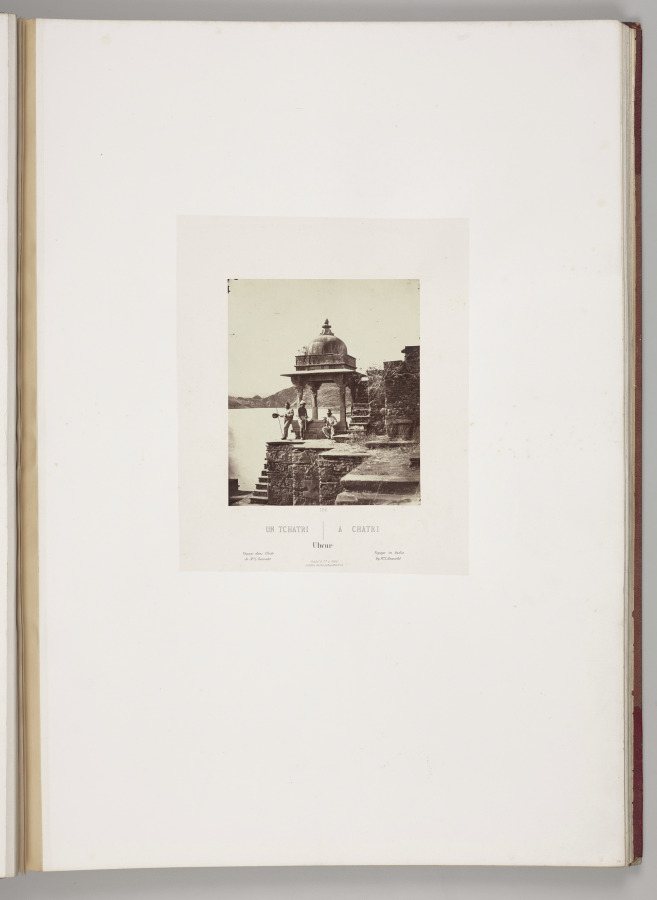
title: A Chatri, Ulwur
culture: France, 19th century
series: India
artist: Louis-Théophile Marie Rousselet (French, 1845–1929)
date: 1865–68, published 1869–70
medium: Albumen print from glass plate negative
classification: Photograph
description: Concerned that his drawings did not do justice to the splendor of India’s monuments, Rousselet learned photography in India that year, a remarkable accomplishment. He proved to be a talented photographer with a sophisticated sense of composition. The scenes in this volume sweep across sites of Sultanate, Rajput, and Mughal power in northern India, from the sacred Hindu city of Varanasi on the Ganges River to Alwar in Rajasthan. Also included are several scenes of industry and portraits of Indian rulers.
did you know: Louis Rousselet described himself as a “scientific traveler” when he went to India alone at age 18 in 1863 and stayed into 1868.